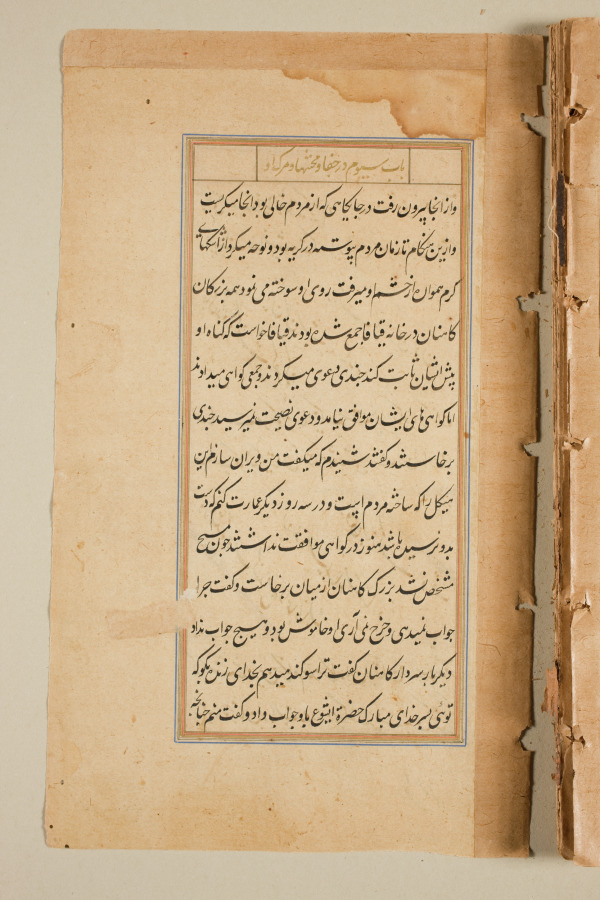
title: Text page from a Mirror of Holiness (Mir’at al-quds) of Father Jerome Xavier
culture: Mughal India, Allahabad, made for Prince Salim (1569–1627)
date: 1602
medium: Ink and gold on paper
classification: Manuscript